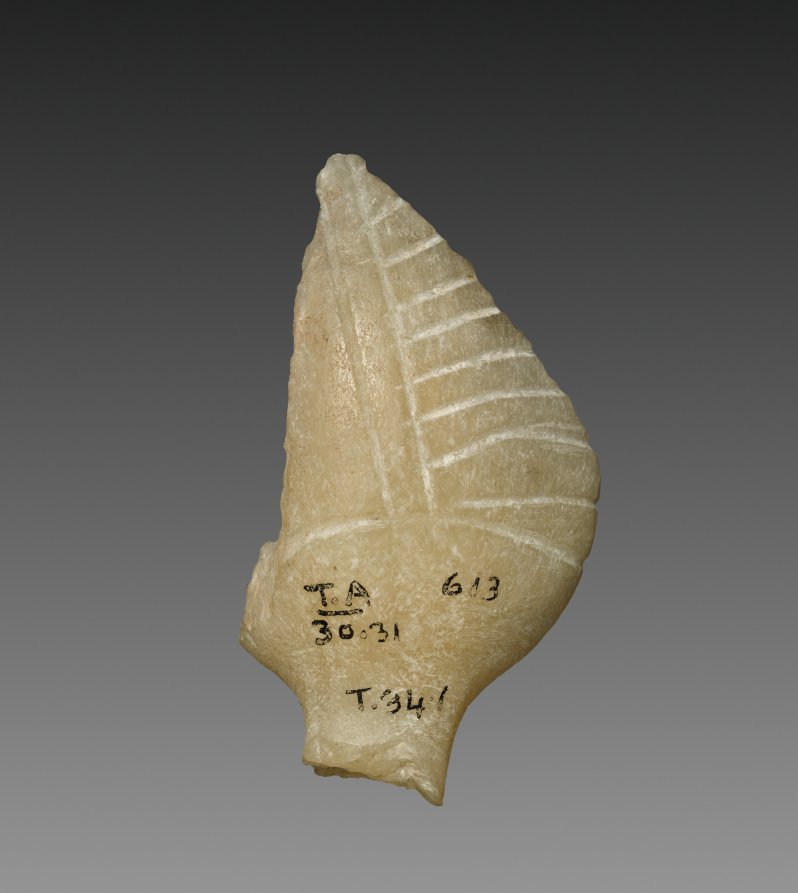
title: Fragment of a Cosmetic Dish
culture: Egypt, Amarna, North Suburb, house T.34.1. Excavations of the Egypt Exploration Society, 1930, New Kingdom (1540–1069 BCE), Dynasty 18, reign of Akhenaten (1351–1334 BCE)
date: 1353–1337 BCE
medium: travertine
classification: Cosmetic Objects